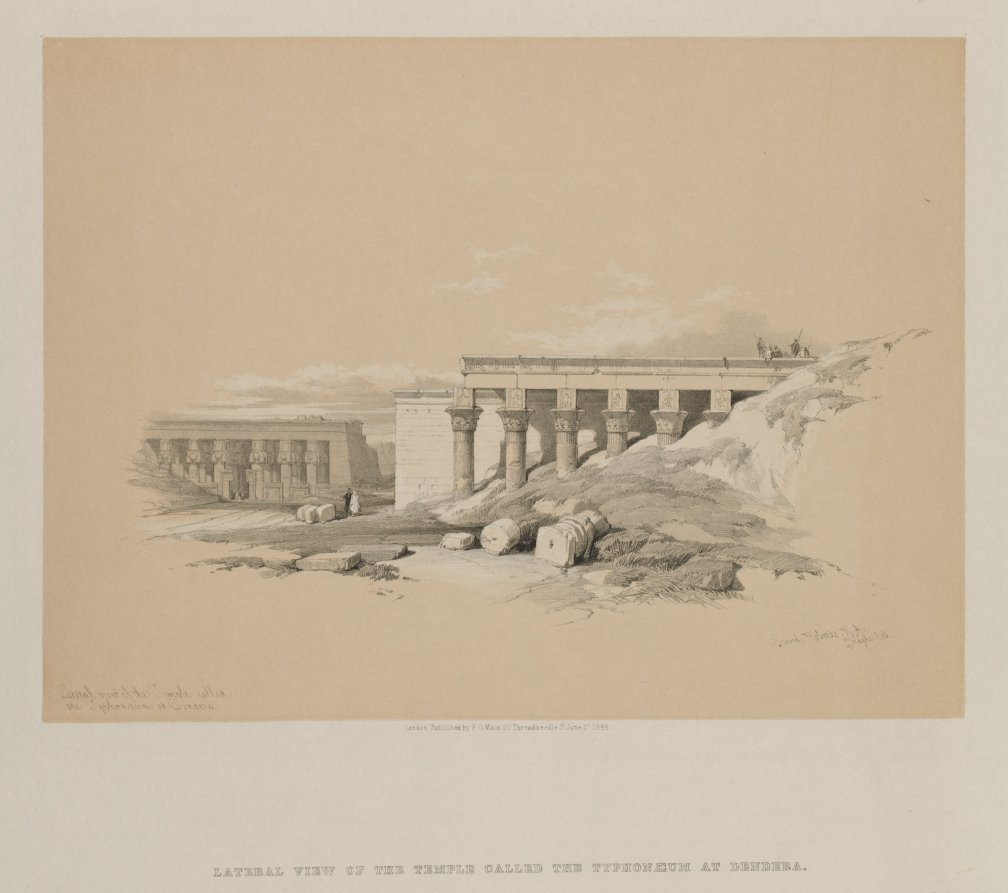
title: Egypt and Nubia, Volume II: Lateral View of the Temple called The Typhonoeum at Dendera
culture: England, 19th century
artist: Louis Haghe (British, 1806–1885)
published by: F. G. Moon, 20 Threadneedle Street, London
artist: after David Roberts (Scottish, 1796–1864)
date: 1848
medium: color lithograph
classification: Print